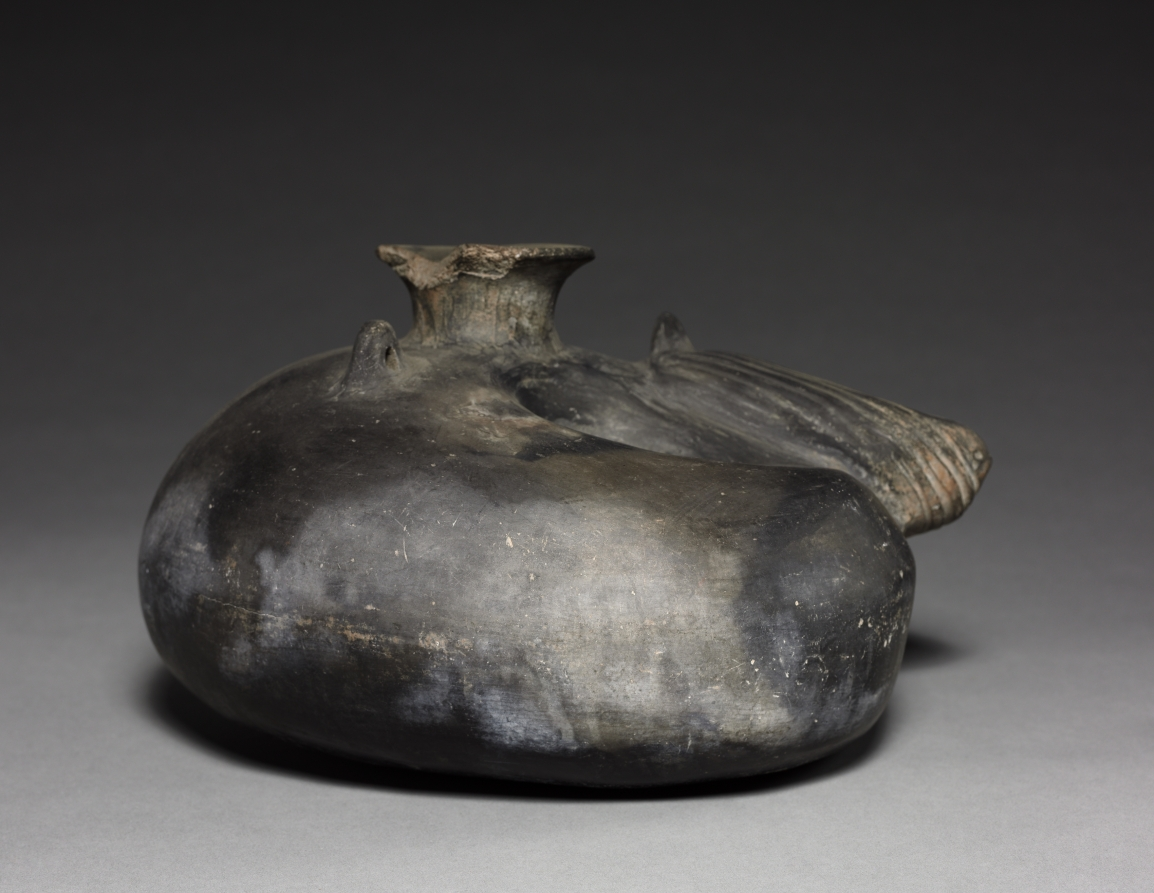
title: Bottle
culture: Peru, Chimú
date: 1300–1400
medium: pottery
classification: Ceramic